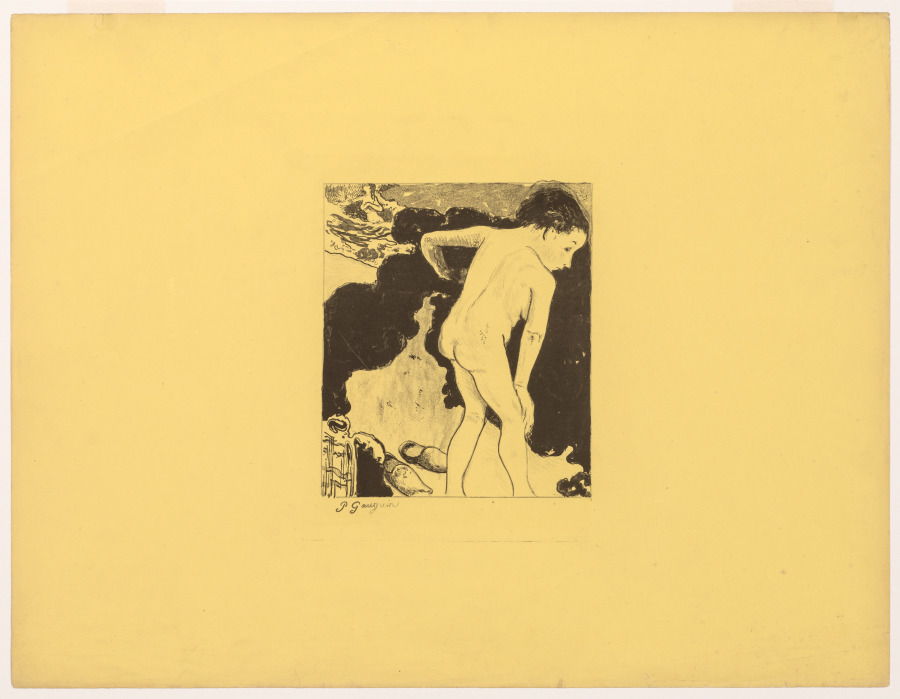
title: Volpini Suite: Breton Bathers (Baigneuses Bretonnes)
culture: France, 19th century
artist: Paul Gauguin (French, 1848–1903)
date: 1889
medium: zincograph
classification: Print